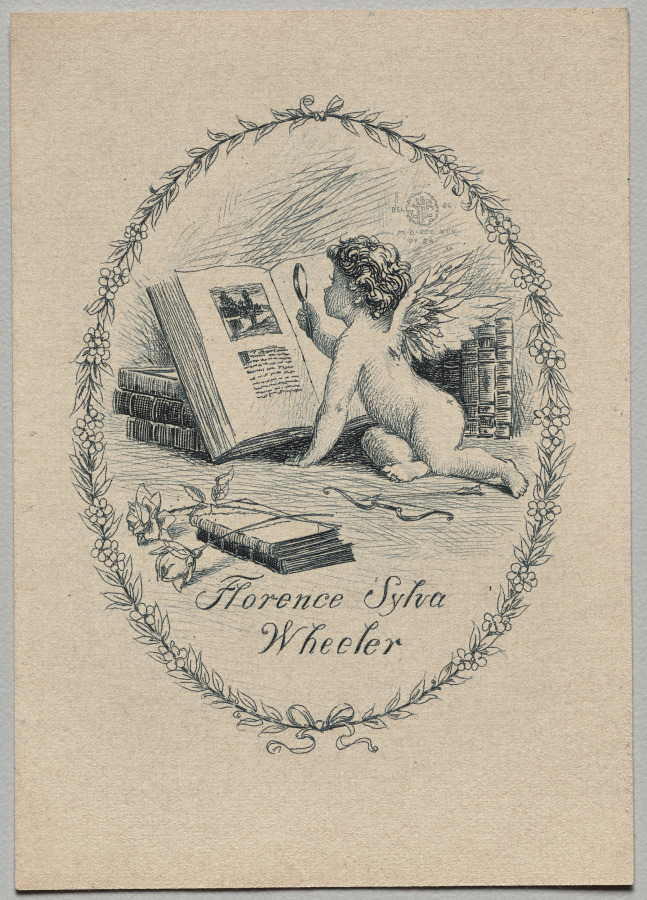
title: Bookplate: Florence Sylva Wheeler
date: 1895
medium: engraving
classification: Print